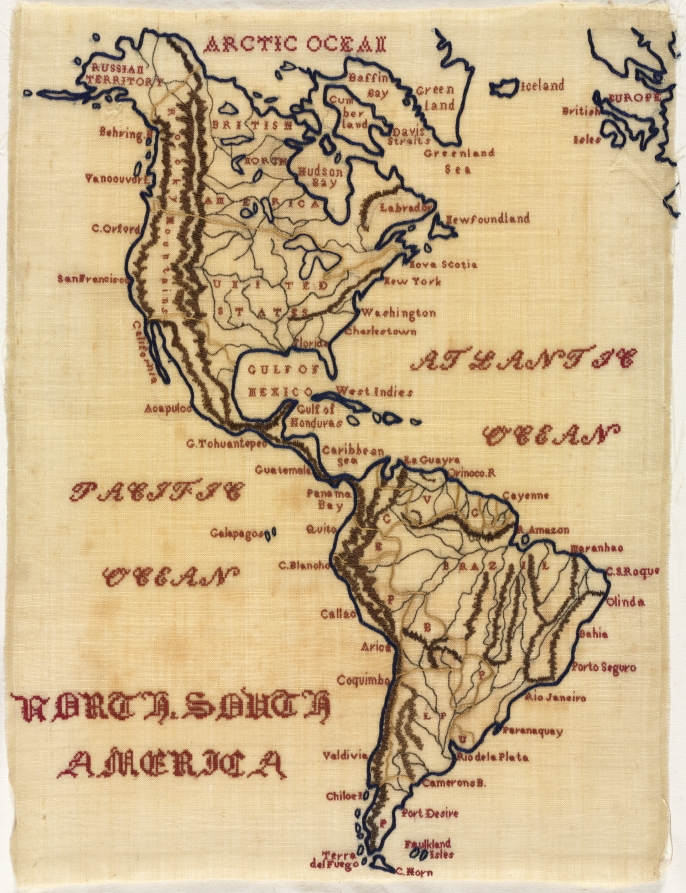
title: Sampler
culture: England, 19th century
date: 1800s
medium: embroidery; silk on woolen canvas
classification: Sampler